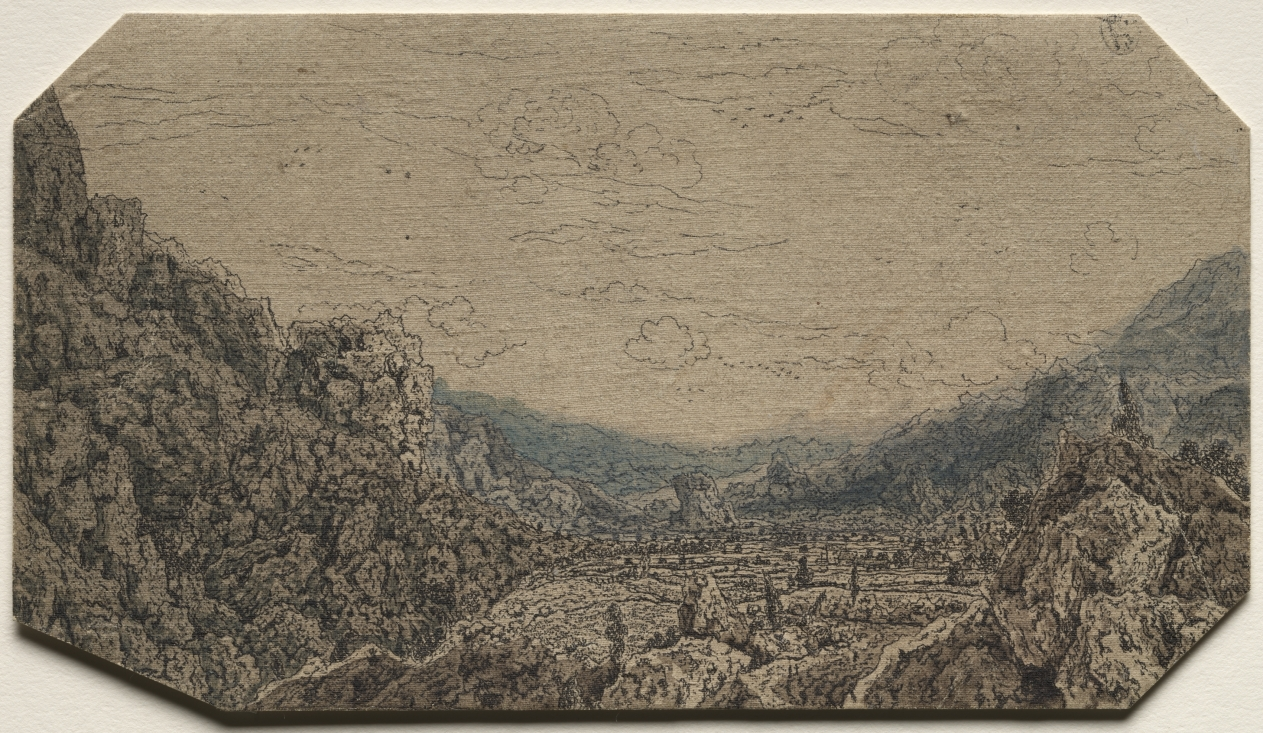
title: Enclosed Valley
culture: Netherlands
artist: Hercules Seghers (Dutch, 1589/90–c. 1638)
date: c. 1623–30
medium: etching on cloth, hand colored with watercolor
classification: Print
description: To make his dreamy and mysterious landscapes, Hercules Seghers combined a number of etching and coloring techniques in order to make prints that met his expressive ends, and which he considered printed paintings. He created 54 etchings, but instead of producing standardized editions printed in black ink on white paper, he made each impression a unique and individualized work of art. He often printed in colored inks on paper prepared with a colored ground, or on cloth (as here), and then painted the printed impression by hand. Cleveland’s etching is one of only ten known impressions of the first state of this print.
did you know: Though largely unknown today, Hercules Segers was one of Rembrandt's favorite artists: he owned eight paintings and one printing plate by Seghers.